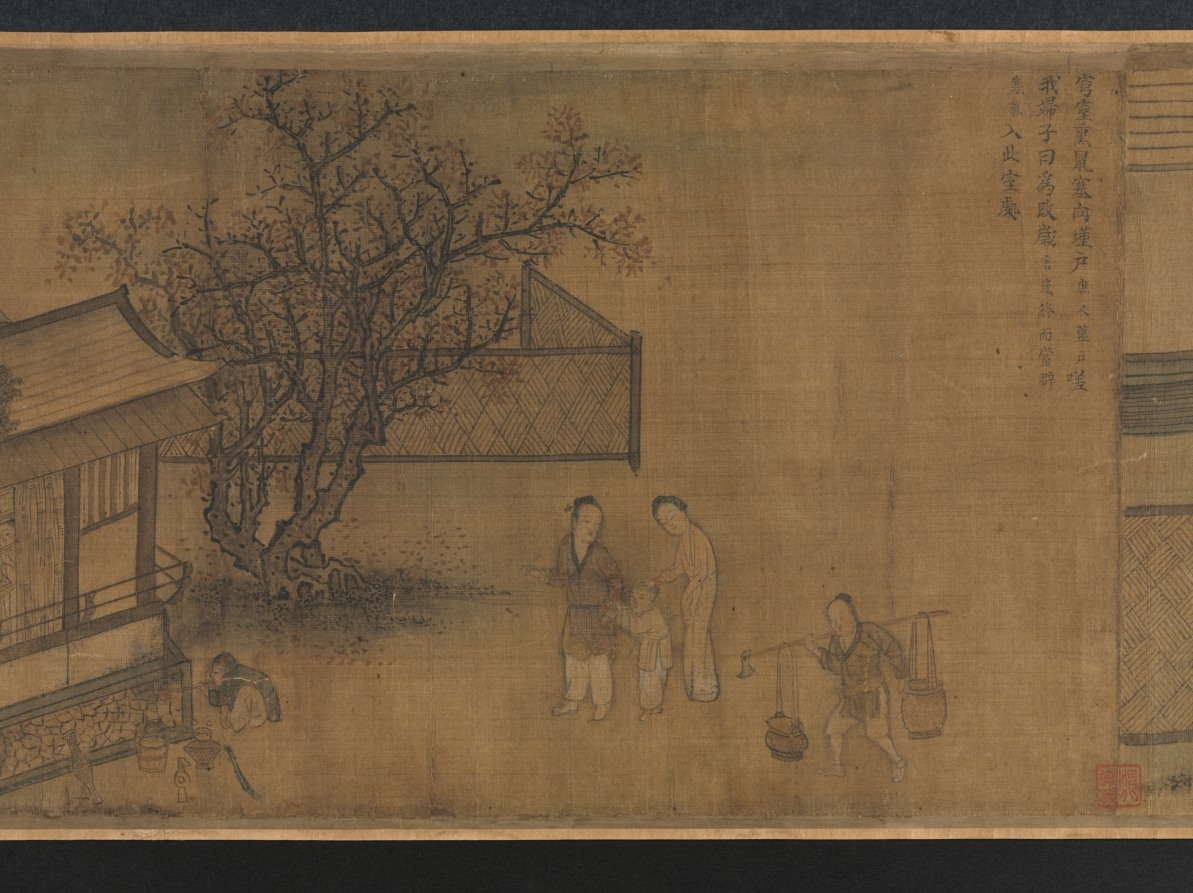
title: "Seventh Month" from the Odes of Bin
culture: China, Southern Song dynasty (1127-1279)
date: 1200s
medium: Handscroll; ink and color on silk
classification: Painting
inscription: Colophons: 1. [on the frontispiece] by the Qianlong emperor (dated 1741). 2. by Lu Wan (dated Zhengde dingchou, 1517). 2. by the Jiaqing emperor (dated 1807).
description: According to Confucian thought, the ruler looks after the well-being of his people which involves agricultural activities. Seventh Month from the ancient Odes of Bin in the Shijing (Book of Poetry) describes occupations throughout the year, including plowing, harvesting, hunting, making clothes, and observing rituals. The earliest illustrations of these Odes accompanied by text were commissioned by Southern Song emperor Gaozong (reigned 1127–1162). As the lower Yangzi delta had become the new seat of government, Gaozong had sets of these illustrations produced by court artists to revive the dynasty and convince the Confucian officialelite of his legitimacy to rule.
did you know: The Odes of Bin appears in the classic Shijing (Book of Poetry), an anthology of more than 300 poems, folk songs, and ceremonial hymns that were originally chanted to music.